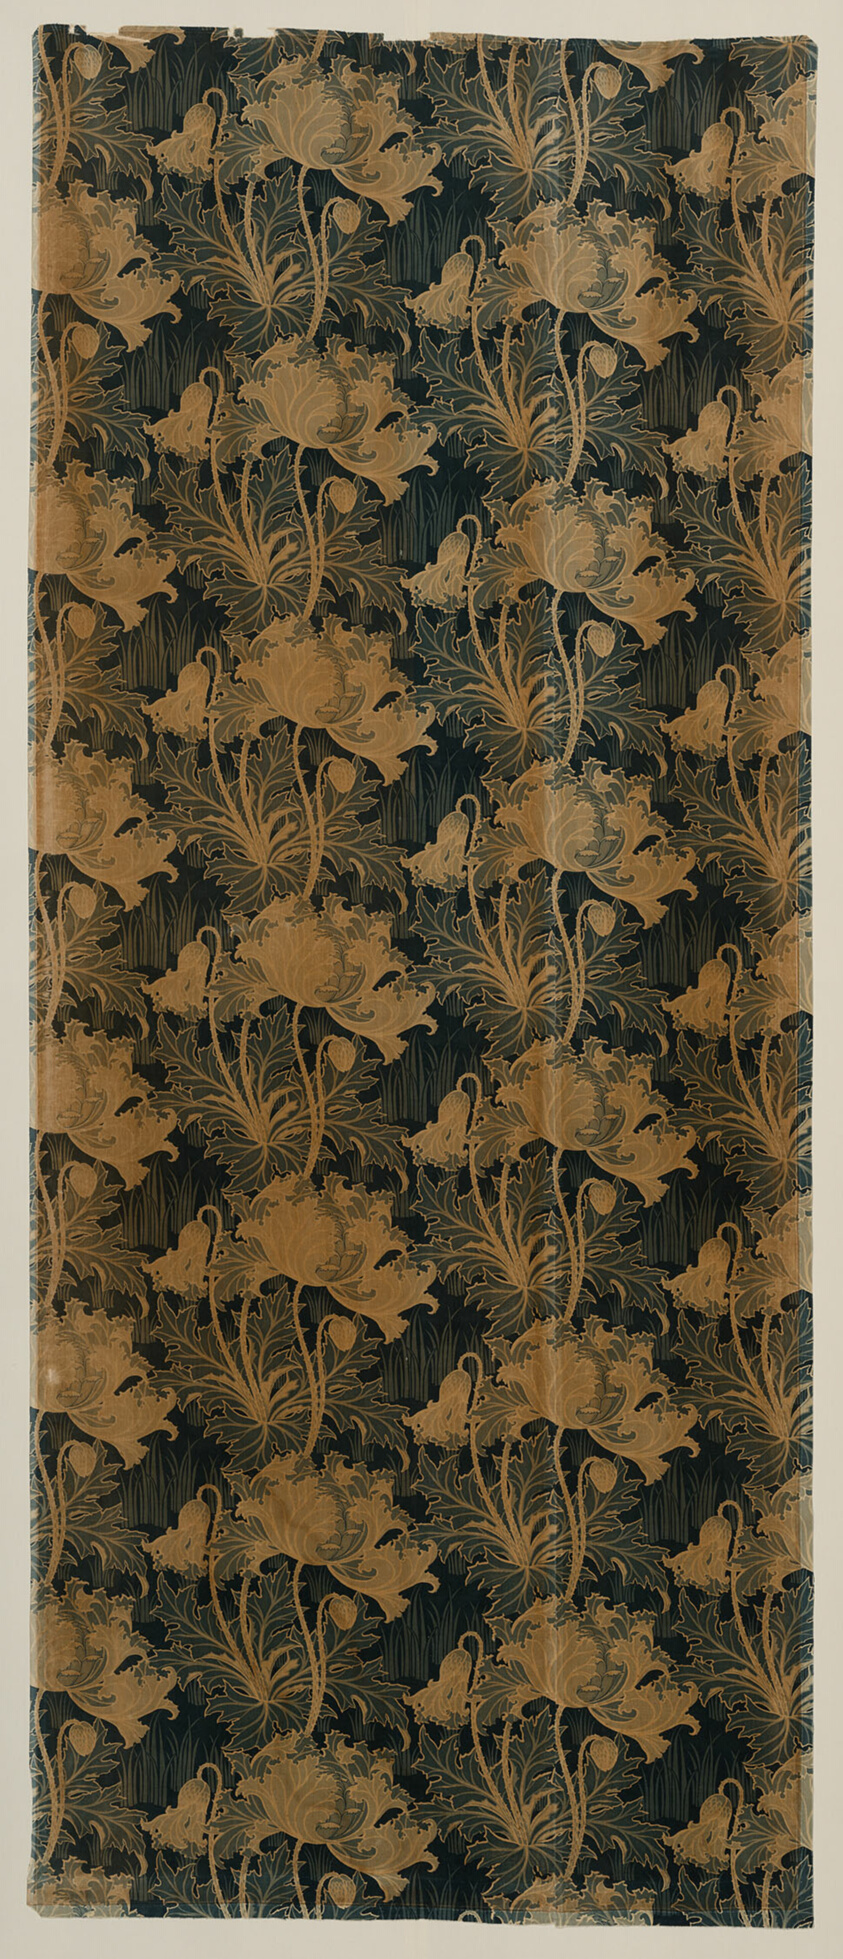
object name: Textile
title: Panel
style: Art Nouveau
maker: Designed by Arthur Silver (English, 1853–1896); France, Mulhouse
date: 1896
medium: Cotton, twill weave with supplementary pile wefts forming cut velvet; block printed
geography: London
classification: textile; weaving - printed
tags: flowers